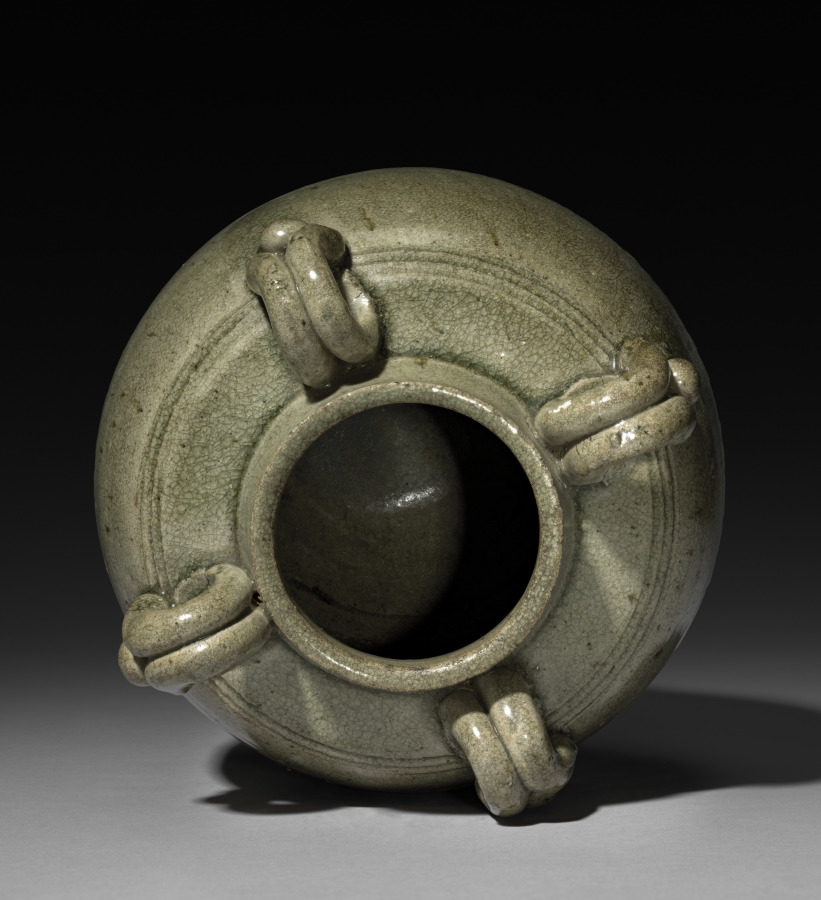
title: Jar with Four Loop-Handles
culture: China, Sui dynasty (581-618) - Tang dynasty (618-907)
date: 500s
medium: glazed gray stoneware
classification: Ceramic